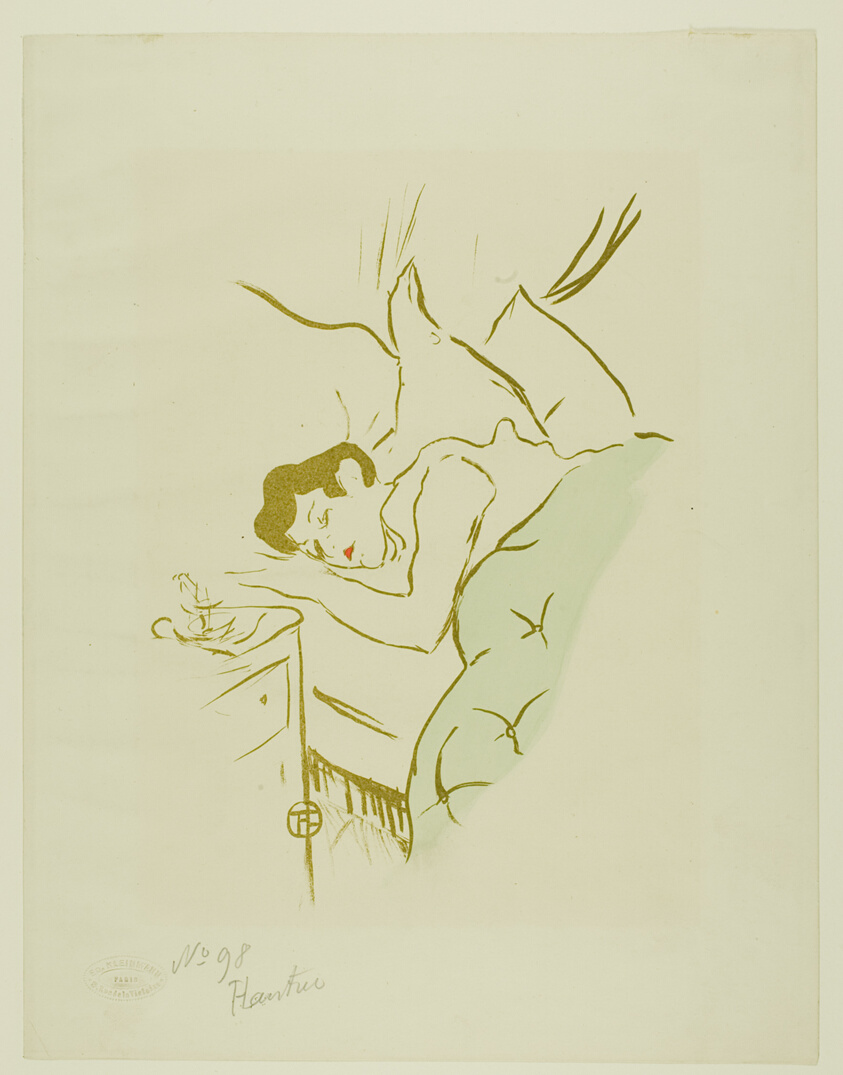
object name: Print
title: Your Mouth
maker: Henri de Toulouse-Lautrec (French, 1864-1901)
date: 1893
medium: Color lithograph on ivory wove paper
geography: France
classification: lithograph; print; prints and drawing